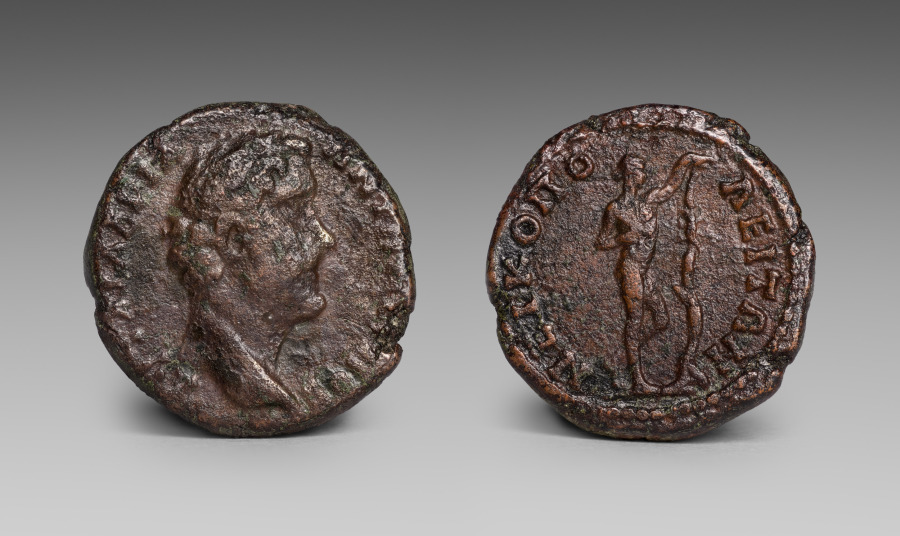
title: As: Head of Antoninus Pius (obverse); Apollo Sauroktonos (reverse)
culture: Roman, minted at Nicopolis ad Istrum (Moesia Inferior)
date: 138–161 CE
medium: bronze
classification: Coins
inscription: ΑV Τ ΑΙ ΑΔΡΙΑ ΑΝΤ[ΩΕΙΝΟΣ]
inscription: ΝΕΙΚΟΠΟ - ΛΕΙΤΩΝ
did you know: Antonius Pius, shown on this coin, was Roman emperor from 138 to 161 CE. He was one of the Five Good Emperors in the Nerva–Antonine dynasty and the Aurelii.